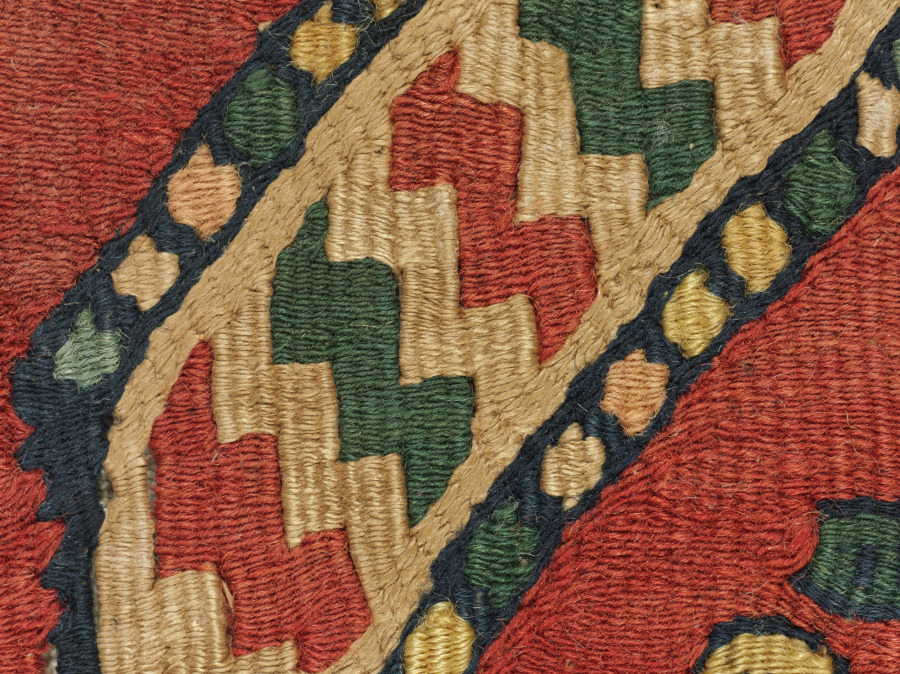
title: Fragmentary Ornament from a Tunic with Lozenges and Medallions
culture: Egypt, Abbasid period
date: mid 700s - mid 800s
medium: tapestry weave; wool and linen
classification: Textile